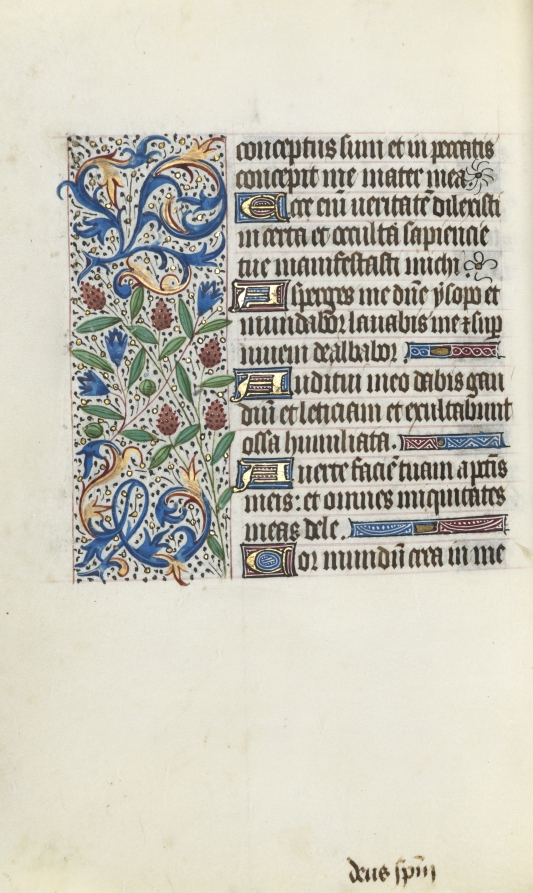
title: Book of Hours (Use of Rouen): fol. 134v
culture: France, Rouen, 15th century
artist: Master of the Geneva Latini (French, active Rouen, 1460–80)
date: c. 1470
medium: ink, tempera, and gold on vellum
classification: Bound Volume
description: In the late 1400s and early 1500s Rouen was an established and important center of book production. The city’s cathedral had a wealthy chapter that spent large sums of money to commission books and to maintain its extensive library. The stationers and booksellers would have likely been concentrated in or near the cathedral precinct. This artist, named after a manuscript now in Geneva, was Rouen’s principal illuminator during the second half of the 1400s.